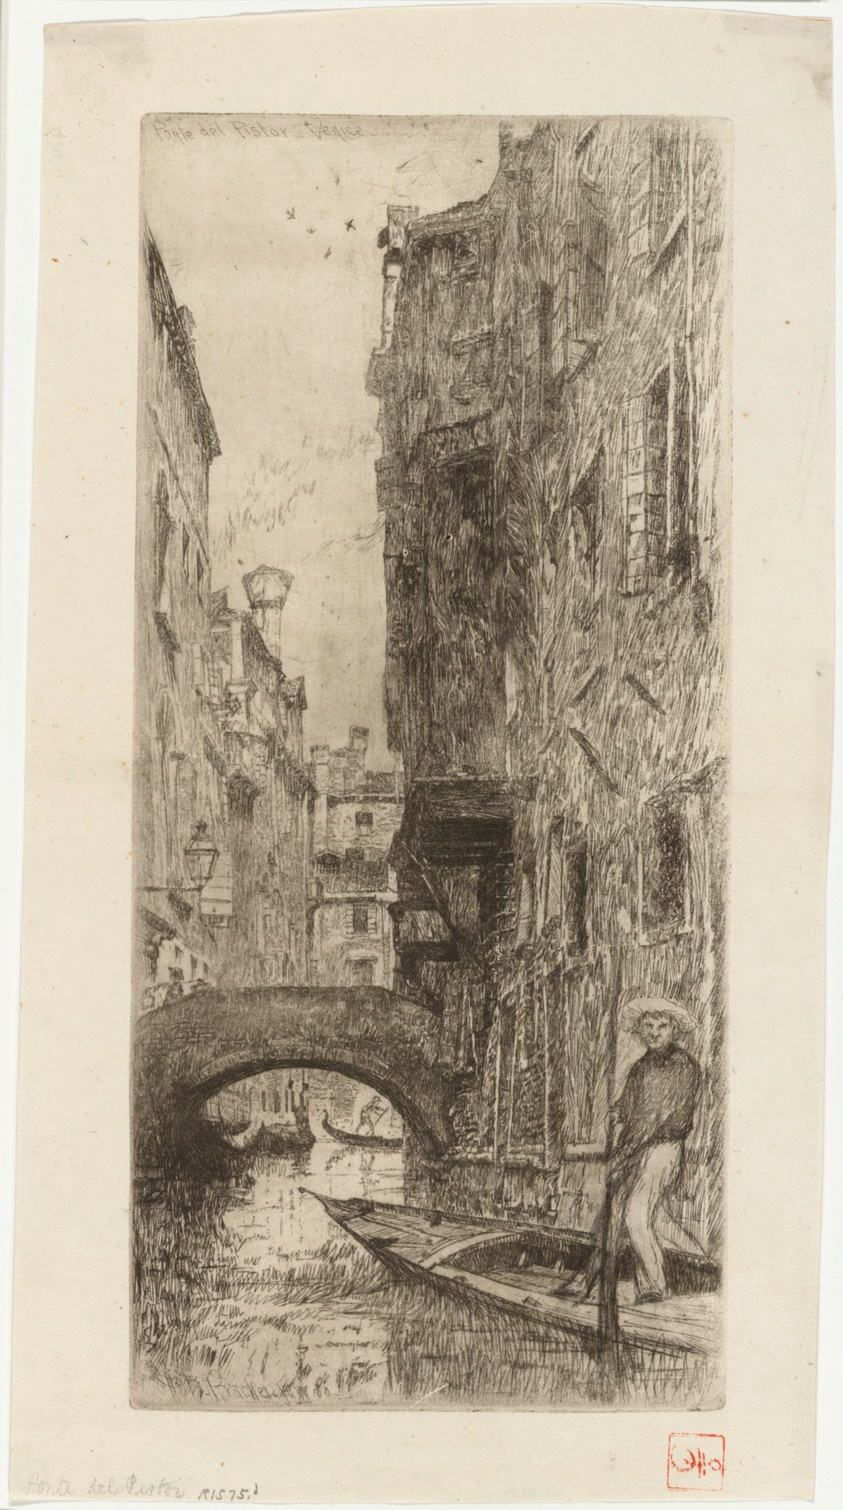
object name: Print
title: Ponte del Pistor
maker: Otto Henry Bacher (American, 1856-1909)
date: 1880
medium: Etching in black on cream laid paper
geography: United States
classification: etching; print; prints and drawing